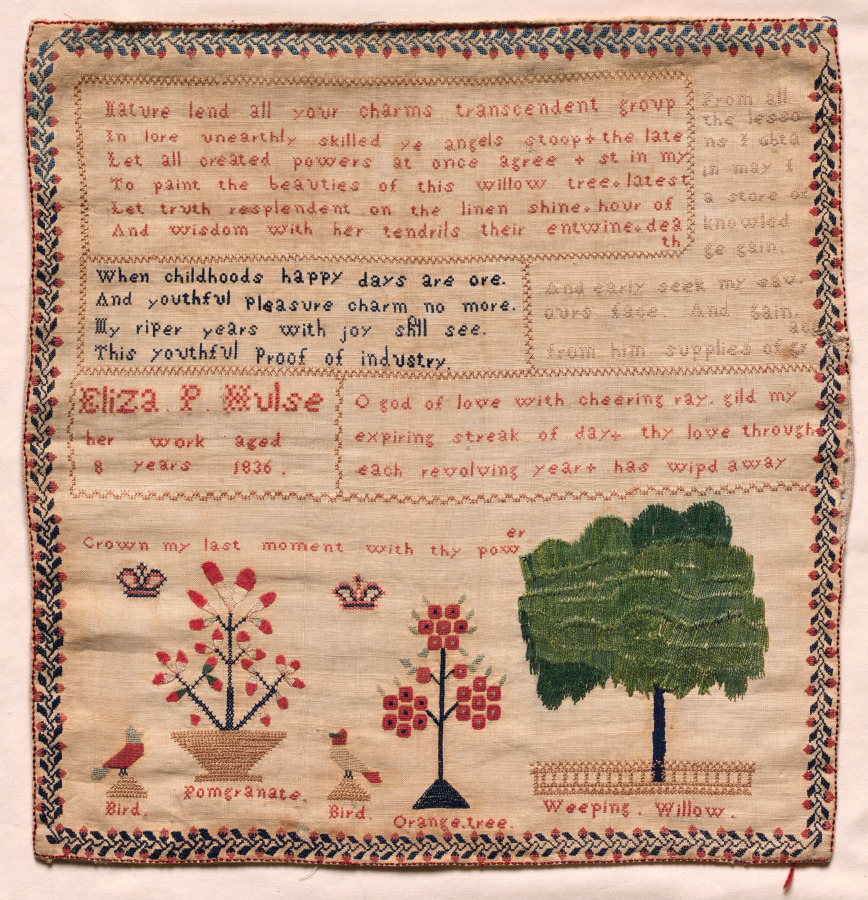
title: Sampler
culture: England, 19th century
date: 1810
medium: embroidery; cotton and silk on linen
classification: Sampler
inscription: in upper left-hand box: "Nature lend all your charms transcendent group/ In lore unearthly skilled ye angels stoop + the late/ Let all created powers at once agree + st in my/ To paint the beauties of this willow tree * latest/ Let truth resplendent on the linen shine * hour of/ And wisdom with her tendrils their entwine * dea/ th" (the latest in my latest hour of death appears as fragments on each line); upper right-hand corner: "from all/ the lesso/ ns I obta/ in may I/ a store of/ knowle/ ge gain./ And early seek my sav./ ours face. And gain/ from him supplies of gr/ ace"; box below upper left-hand box: "When childhoods happy days are ore./ And youthful pleasure charm no more./ My riper years with joy sh'll see./ This youthful proof of industry"; central left-hand box: "Eliza P. Hulse/ her work aged/ 8 years 1836."; central right-hand box: "O god of love with cheering ray. gild my/ expiring streak of day+ thy love through/ each revolving year + has wiped away"; above embroidered motifs: "Crown my last moment with thy power"; below each motif: "Bird."; "Pomgranate."; "Bird."; "Orange.tree." "Weeping . Willow ."